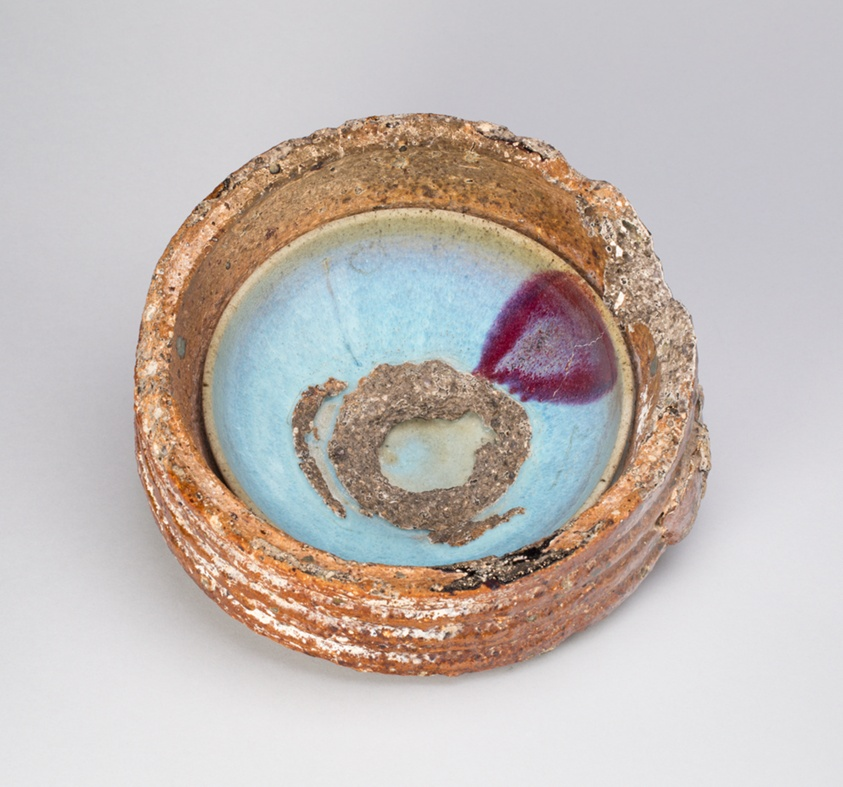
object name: Vessel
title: Bowl in Saggar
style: Chinese (culture or style)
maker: China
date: Yuan dynasty (1279–1368), late 13th/early 14th century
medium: Bowl: Jun ware, glazed stoneware Saggar: earthenware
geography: Hunan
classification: bowl; dish (vessel); ceramics; asian art; vessel